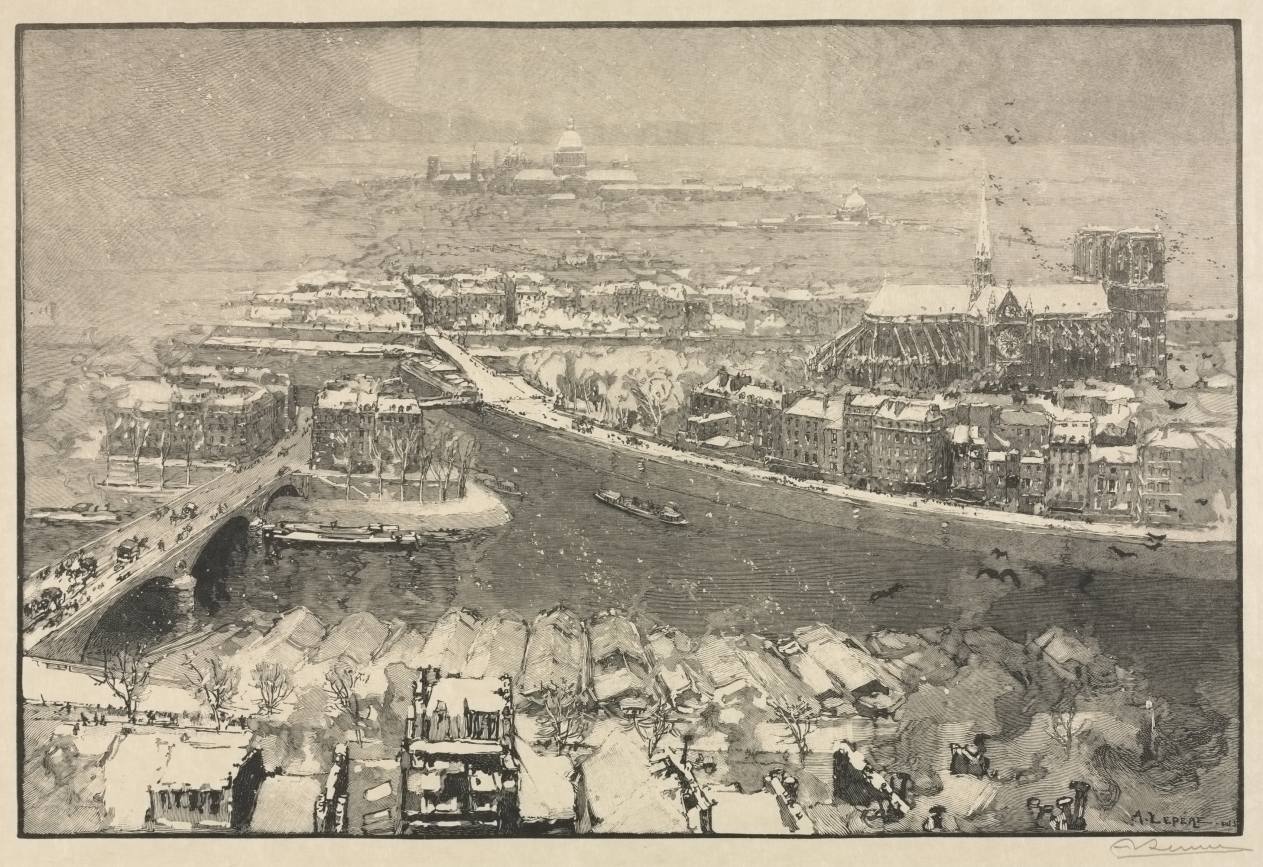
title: Paris under Snow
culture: France, 19th century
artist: Auguste Louis Lepère (French, 1849–1918)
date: 1890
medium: wood engraving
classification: Print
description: Wood engraving was perfected about 1770 in England by Thomas Bewick (1753–1828). Since the end grain of a hard wood is used, the block can be engraved with a sharp instrument called a burin, making closely set lines possible and producing a great range of textures and tones. The surface of the block is inked and printed so that the engraved lines appear as white areas. The strength of the block meant that numerous impressions could be printed. Wood engraving thus became a principal method for illustrating books and newspapers in the 19th century. Lepère developed an extraordinary mastery of wood engraving, which he used to effectively describe a snowy view of central Paris. The confetti-like snowflakes silhouetted against the dark river, and the overall blurring effect caused by the snowfall in the distance, are a tour de force.